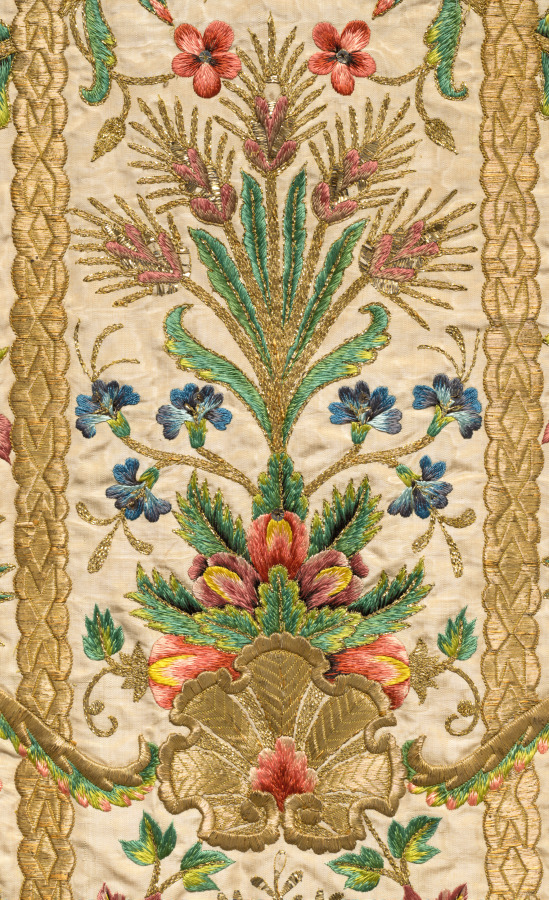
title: Chasuble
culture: Italy, 18th century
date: 1700s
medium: Silk and metallic threads; embroidery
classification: Textile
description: A beautiful design emanates from a vase in the center of this chasuble, displaying symmetrical flora that extend across embroidered gold braids into graceful curvilinear cartouches, reflecting contemporary architectural decoration. Also in the center, sheaves of wheat and grapes represent the bread and wine of the Mass. Gold sequins within thread-outlined squares illustrate fine quality workmanship. The decoration of the stole and chalice veil is similar to the chasuble, also on moiré (watered) silk fabric. The stole, an insignia of the office of deacons and priests, is worn under a chasuble, and the chalice veil—bearing the monogram of Jesus Christ, ihs, in the center—covers the chalice and paten (the plate holding the Eucharistic bread).